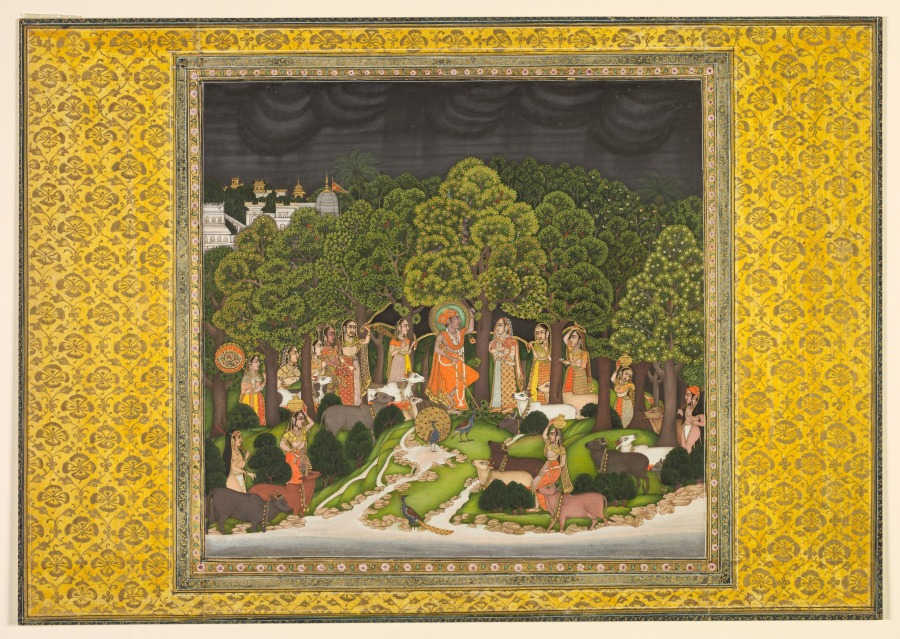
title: Radha and Krishna meet in the forest during a storm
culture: India, Bengal, Mughal, 18th century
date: c. 1770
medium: Gum tempera and gold on paper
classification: Painting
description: This painting depicts the Hindu deity Krishna as a youth among the villagers of the cowherding community where he grew up. Drawn to him, the women hurry to hold a coverlet over him in protection from the rain, not realizing that he is able to lift a mountain to shield them all. Birds and monkeys populate the trees, and a Hindu temple and palace buildings stand in the background. This vibrant work was probably made for an aristocratic Hindu ruler of territories in eastern India during the period when Mughal artists dispersed from the imperial center after the invasion of Delhi in 1739.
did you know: The belly of the white cow has been colored orange with henna.